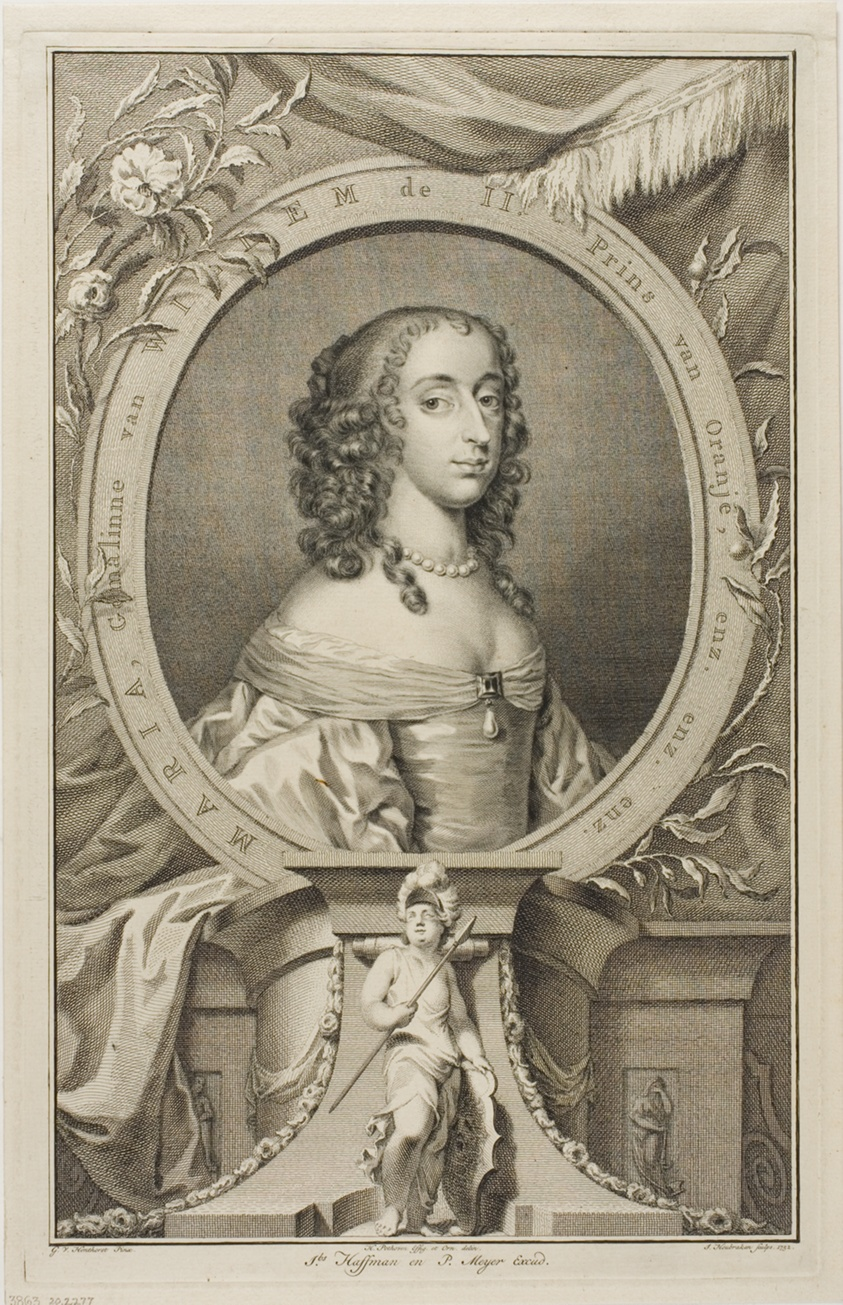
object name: Print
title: Maria, Wife of Willem II of Orange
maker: Jacobus Houbraken (Dutch, 1698-1780); after Gerrit van Honthorst (Dutch, 1590-1656)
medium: Engraving Engraving on paper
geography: Holland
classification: engraving; print; prints and drawing